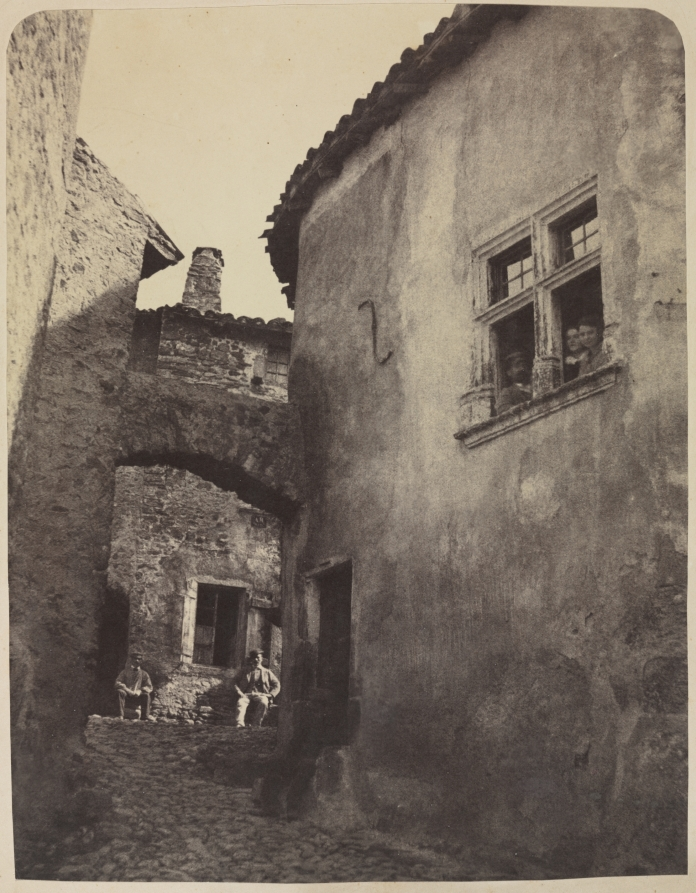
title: View of a Village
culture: France, 19th century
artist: Domini (French, 1829–1895)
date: late 1850s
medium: albumen print from wax paper negative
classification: Photograph